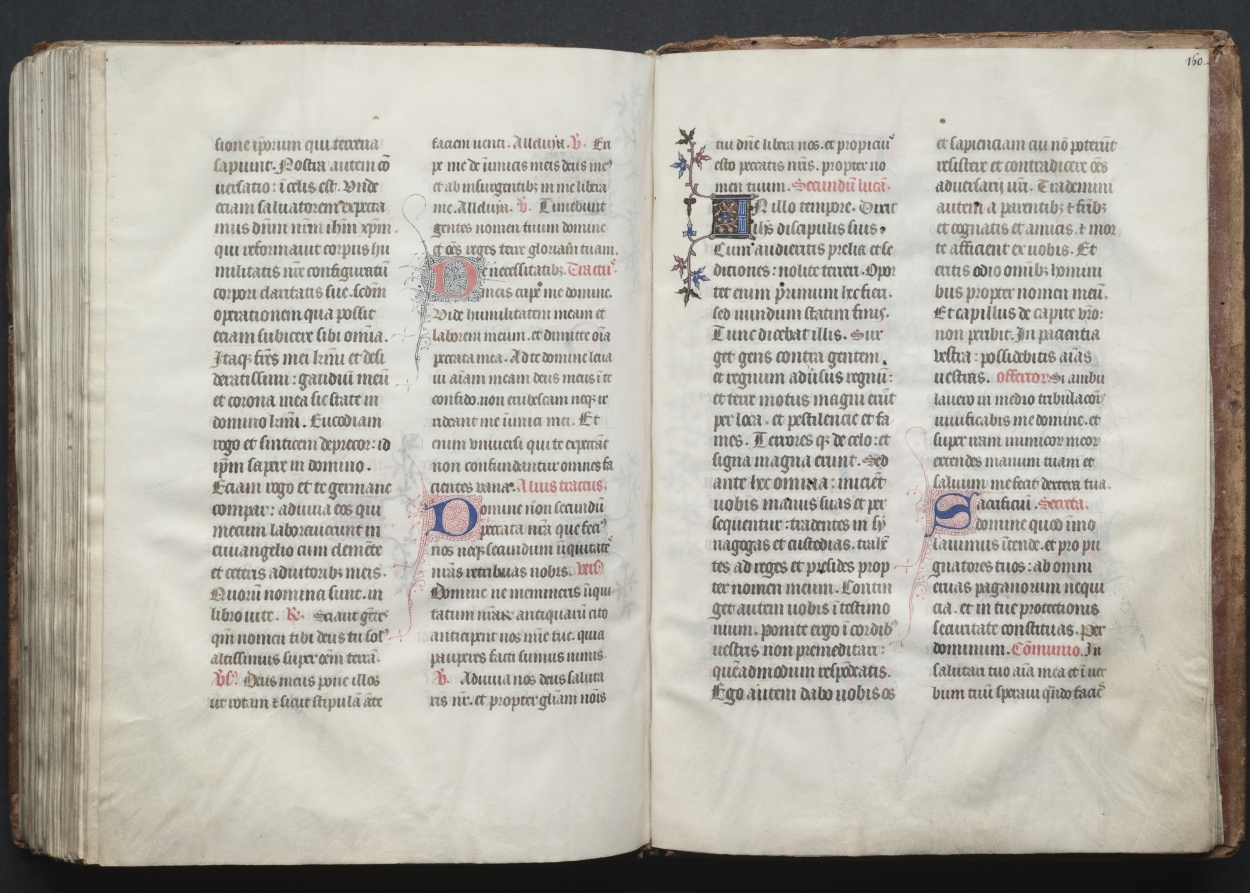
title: The Gotha Missal: Fol. 160r, Text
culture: France, Paris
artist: Master of the Boqueteaux (French)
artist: and Workshop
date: c. 1375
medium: ink, tempera, and gold on vellum; blind-tooled leather binding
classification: Bound Volume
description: The style and quality of this manuscript's decoration is typical of deluxe Parisian books made for aristocratic or royal patrons. Most of the book's decoration appears to be the work of the Master of the Boqueteaux, an artist active at the court of King Charles V (died 1380). His style was apparently shared by a number of book illuminators working in and around Paris. It is very possible that the Gotha Missal belonged to Charles V, but is not provable because the manuscript has no royal portraits and lacks a colophon. Given the book's magnificent decoration, however, it would seem that it was produced for a Valois prince, if not for the king himself. The manuscript receives its name from the German dukes of Gotha, its later owners.